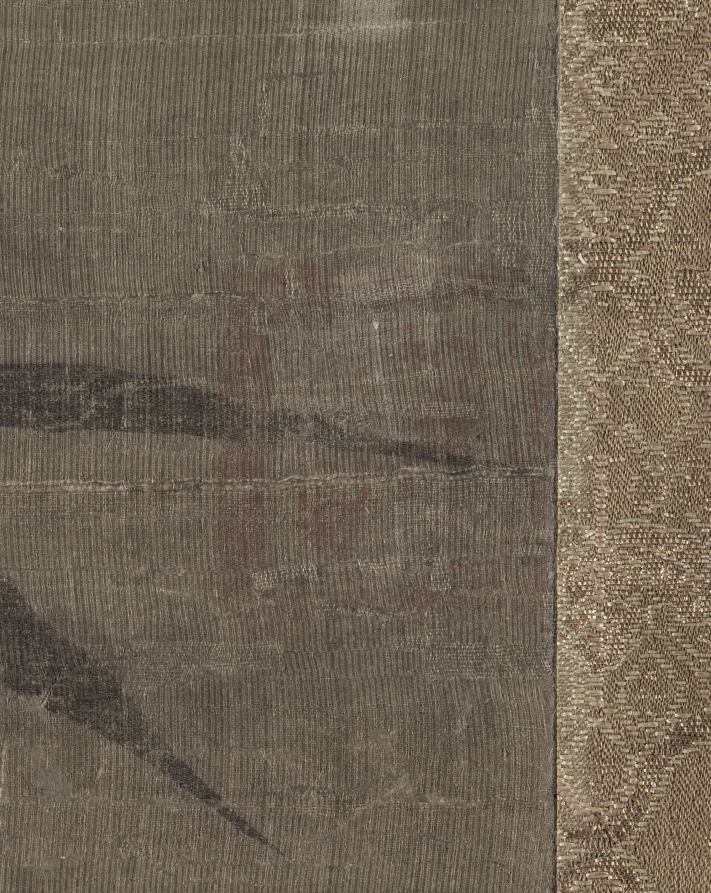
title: Bamboo in Four Seasons: Spring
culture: China, Yuan dynasty (1271-1368)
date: 1279–1368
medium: hanging scroll, ink on silk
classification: Painting